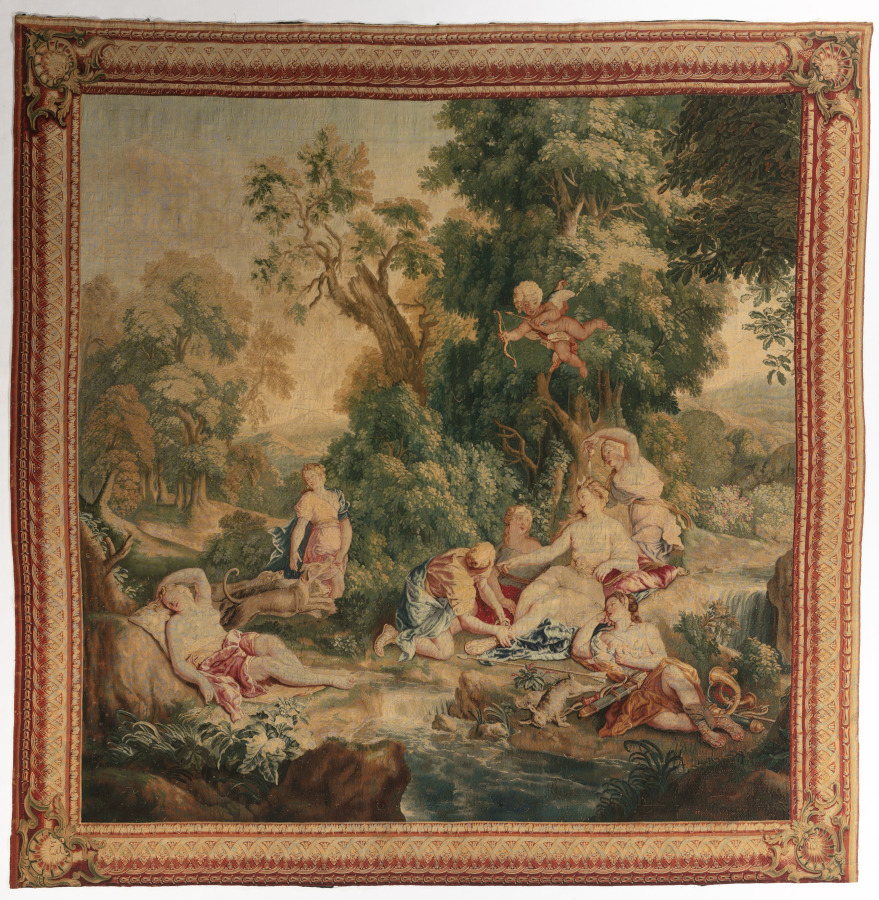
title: Diana's Return from the Chase (from Set of Ovid's Metamorphoses)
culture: France, 18th century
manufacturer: Gobelins Manufactory (France, Paris, est. 1662)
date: 1704–1731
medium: tapestry weave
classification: Tapestry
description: This tapestry’s elaborate border emulates a gilt picture frame, a key characteristic of eighteenth-century Gobelins tapestries. It portrays the goddess Diana at two distinct moments, during and following the hunt, the first accompanied by three dogs, and the second reclining among five attendants. The figures are positioned in a lush landscape near a small stream. A putto, poised to place an arrow in his bow, hovers above Diana. Goddess of the hunt and associated with wild animals and the moon, Diana can be identified by the crescent worn above her forehead. The dead hares indicate a successful hunt.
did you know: During the French Revolution, Gobelins tapestries were sometimes disassembled to harvest the gold threads.